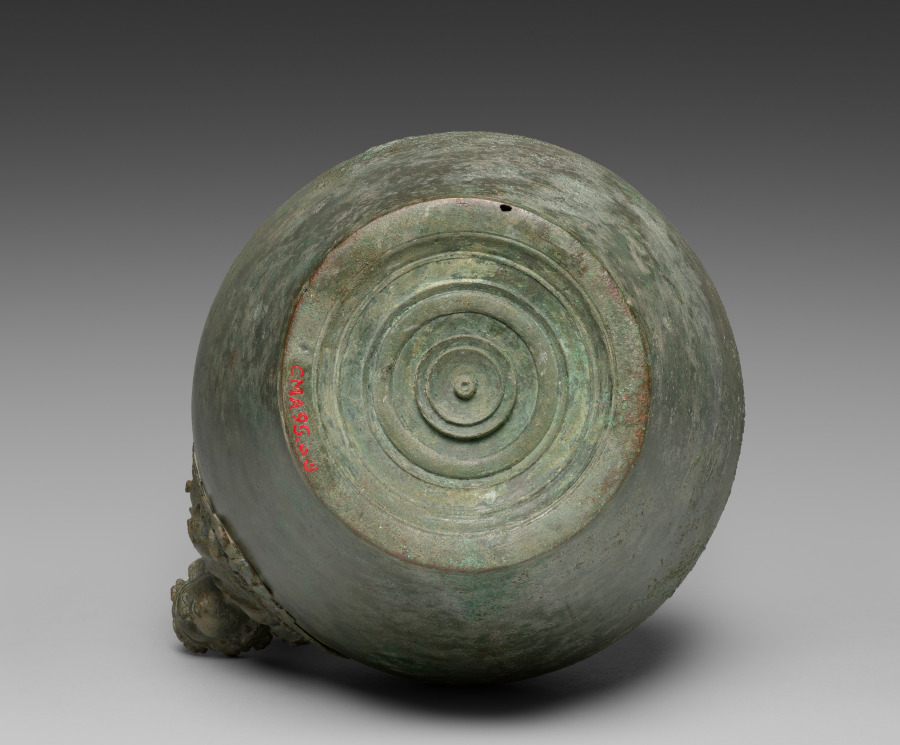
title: Olpe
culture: Italy, Roman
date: 1–100 CE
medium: cast bronze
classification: Metalwork